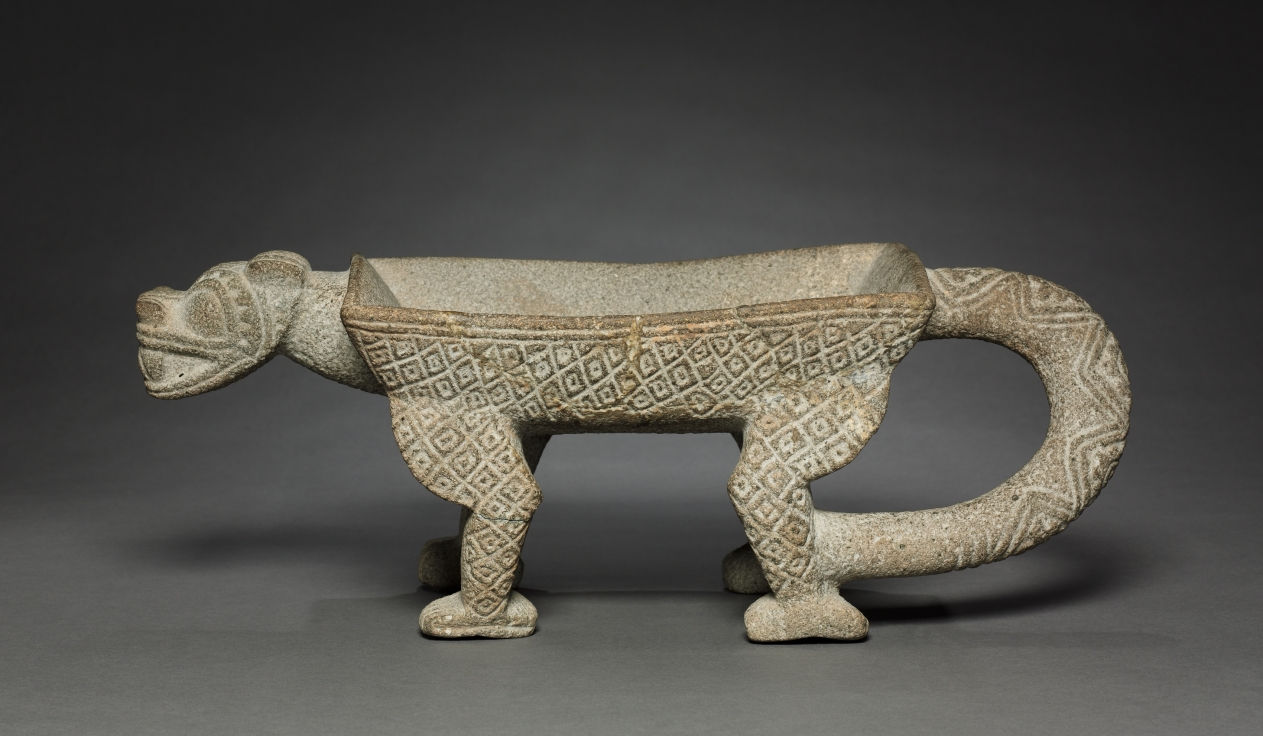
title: Jaguar Grinding Stone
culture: Costa Rica, Atlantic Watershed region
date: c. 1000–1550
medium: stone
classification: Sculpture